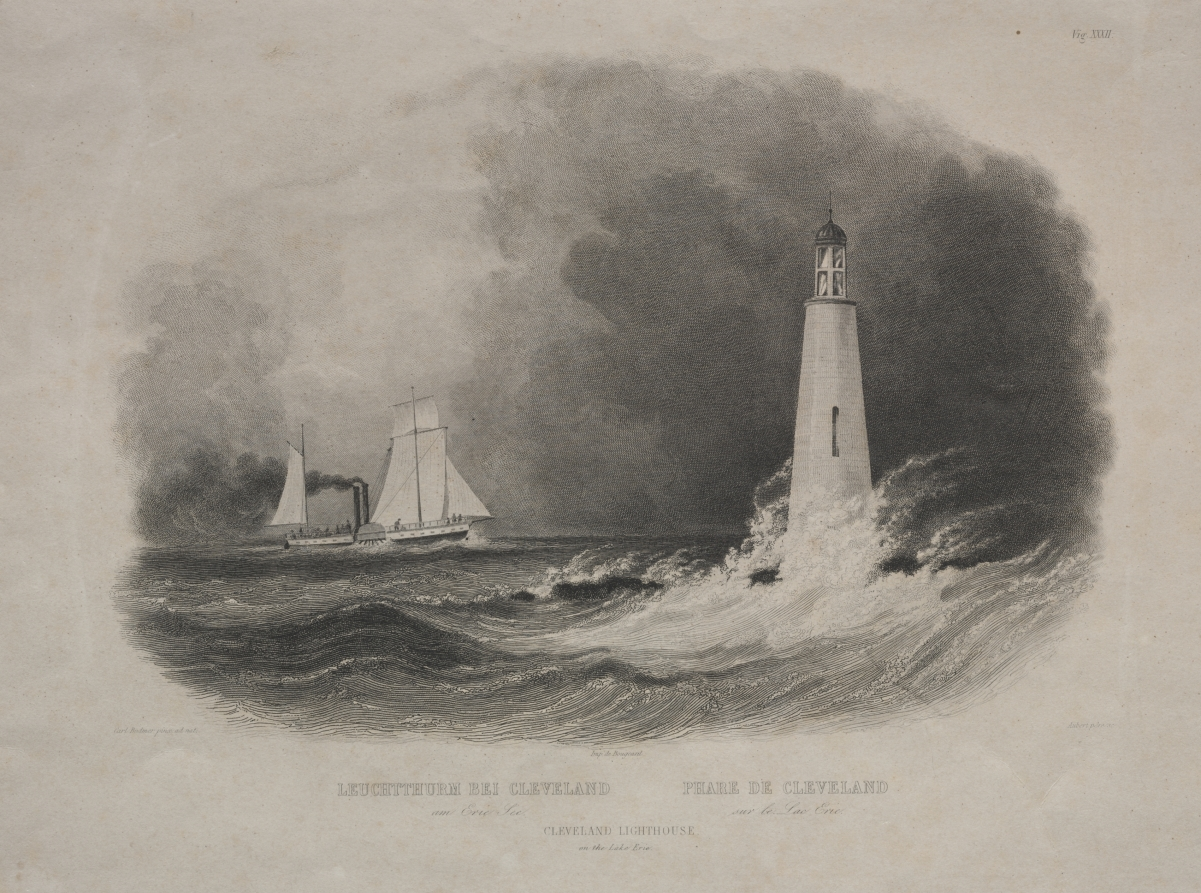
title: Lighthouse in Cleveland, Ohio, on Lake Erie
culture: France, 19th century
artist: Pierre Eugène I Aubert (French, 1789–1847)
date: c. 1839–41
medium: engraving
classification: Print